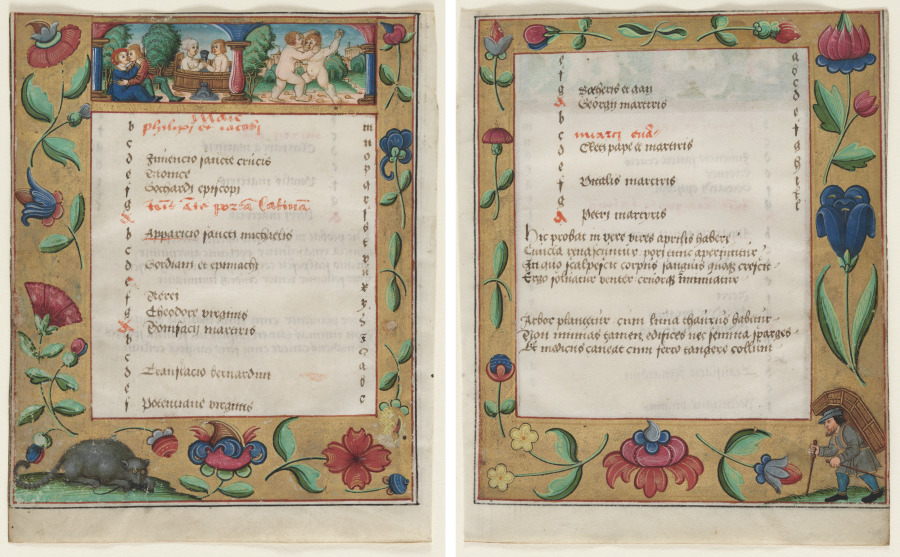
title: Leaf from a Psalter and Prayerbook: Calendar Page with Labors (recto) and Calendar Page with Peasant (verso)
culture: Germany, Hildesheim (?), 16th century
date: c. 1524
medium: ink, tempera and liquid gold on vellum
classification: Manuscript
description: These three leaves represent the charming, intricate decoration found throughout the parent volume, its leaves now dispersed. Virtually every border, recto and verso, was decorated with liquid gold and highlighted with a variety of flowers, fruits, and vegetables—carnations, thistles, roses, violets, peas, melons—as well as cornucopias, satyrs, masks, insects, birds, etc. The decoration is particularly charming because of the little vignettes within the borders. These motifs depict a girl kneading bread, a cook ladling soup, a goose nibbling grapes off a vine, and a satyr with a horn. Such details would have been a sumptuous delight to the original owner. This was a highly personalized volume, apparently written and illuminated in North Germany. The prominent mention of Saint Godehard (died 1038), Bishop of Hildesheim, in the original manuscript suggests that it was produced in that city.